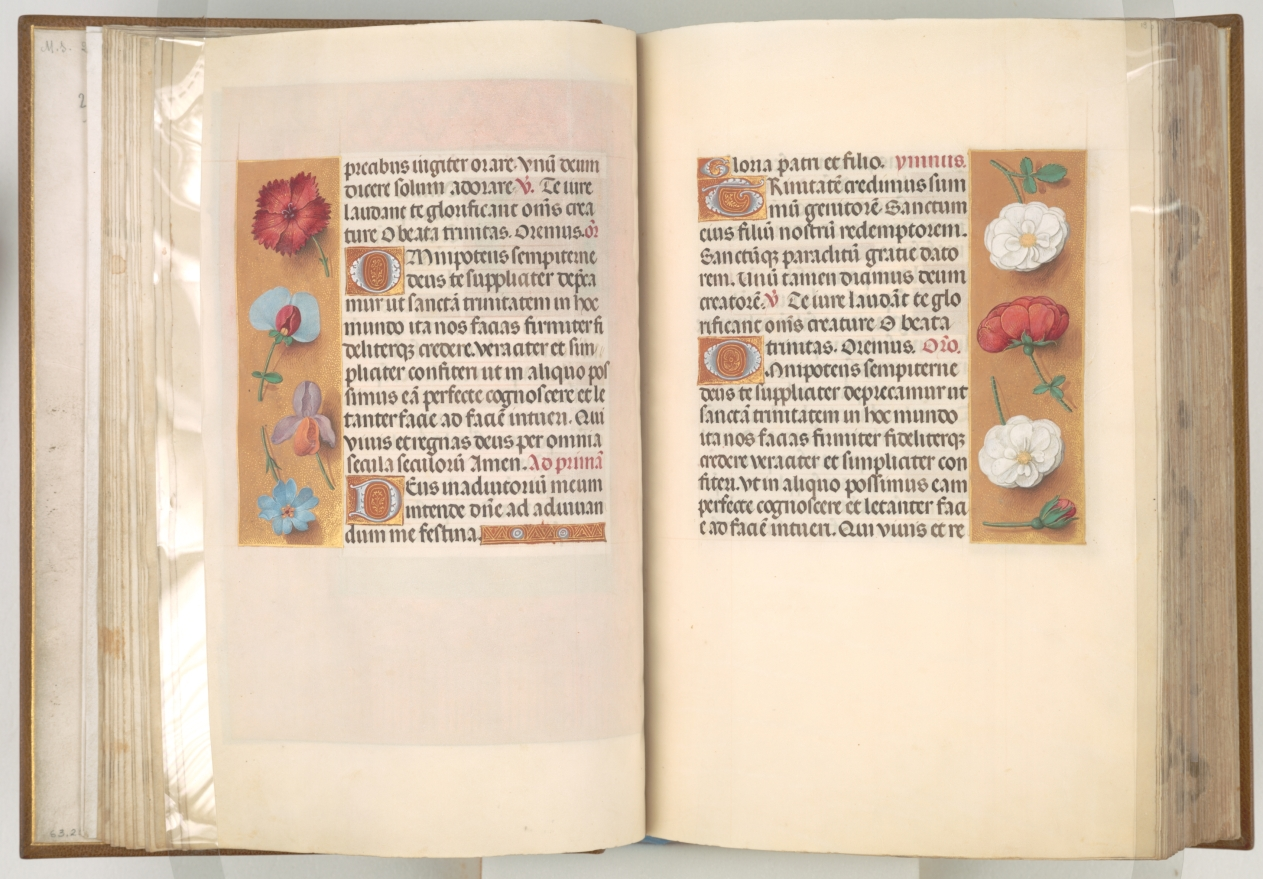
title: Hours of Queen Isabella the Catholic, Queen of Spain: Fol. 18v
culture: Flanders, Ghent and Bruges, late 15th century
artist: Master of the First Prayerbook of Maximillian (Flemish, c. 1444–1519)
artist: and Associates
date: c. 1500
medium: ink, tempera, and gold on vellum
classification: Bound Volume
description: This manuscript was illuminated by a circle of at least five highly organized manuscript painters active in the Flemish cities of Ghent and Bruges. The principal illuminator was Alexander Bening, who painted the majority of the book's miniatures. Manuscripts produced by this circle of artists are renowned for the decoration of their borders, which typically feature a rich variety of realistically-painted flowers, birds, and butterflies. This prayer book, called a book of hours, was intended not for a cleric, but for the private devotions of a lay person-in this case, Isabella the Catholic, Queen of Spain (1451-1504). Isabella's coat of arms embellishes the book's frontispiece. It is unlikely that the book was commissioned by the Queen herself; rather, she probably received it as a diplomatic gift from someone courting her patronage, perhaps Cardinal Francisco Jimenez de Cisneros. A Franciscan friar, Jimenez was dependent upon Isabella for his advancement, first to the post of Queen's confessor in 1492, and then to Archbishop of Toledo in 1495.